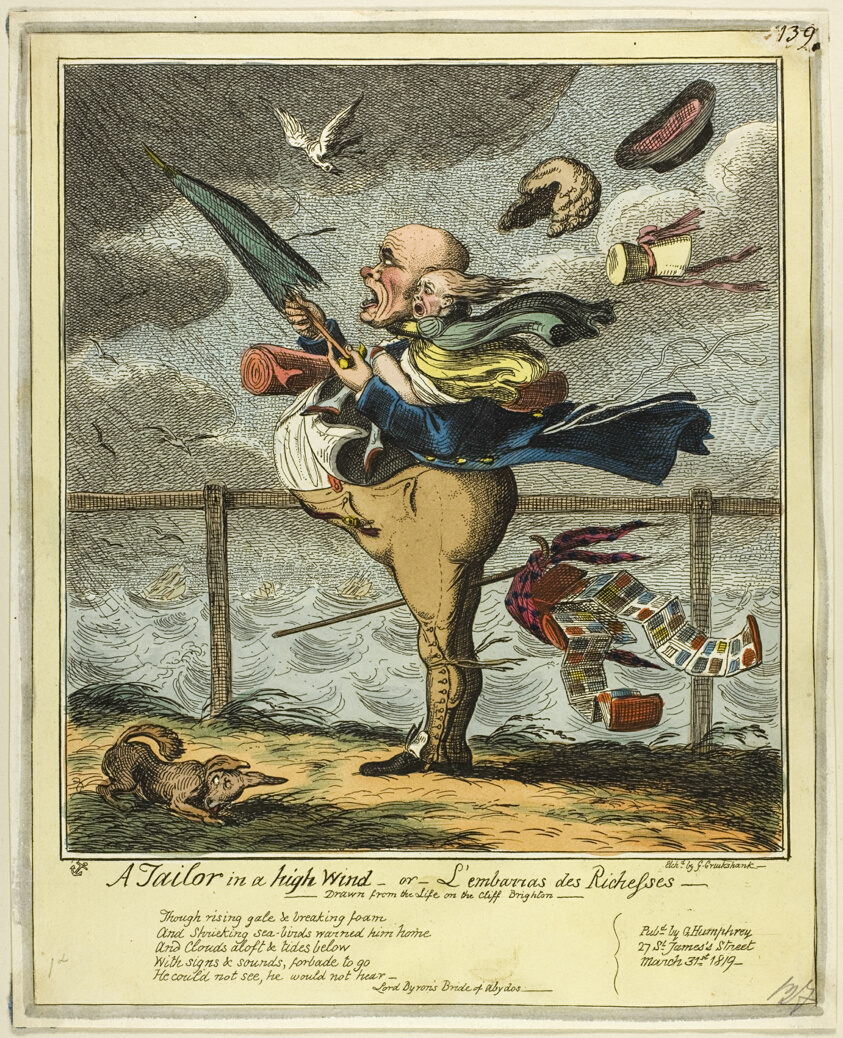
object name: Print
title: A Tailor in a High Wind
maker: George Cruikshank (English, 1792-1878); after Captain Frederick Marryat (English, 1792-1848); published by George Humphrey (English, c. 1773-1831)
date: published March 31, 1819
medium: Hand-colored etching on paper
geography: England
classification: etching; print; prints and drawing